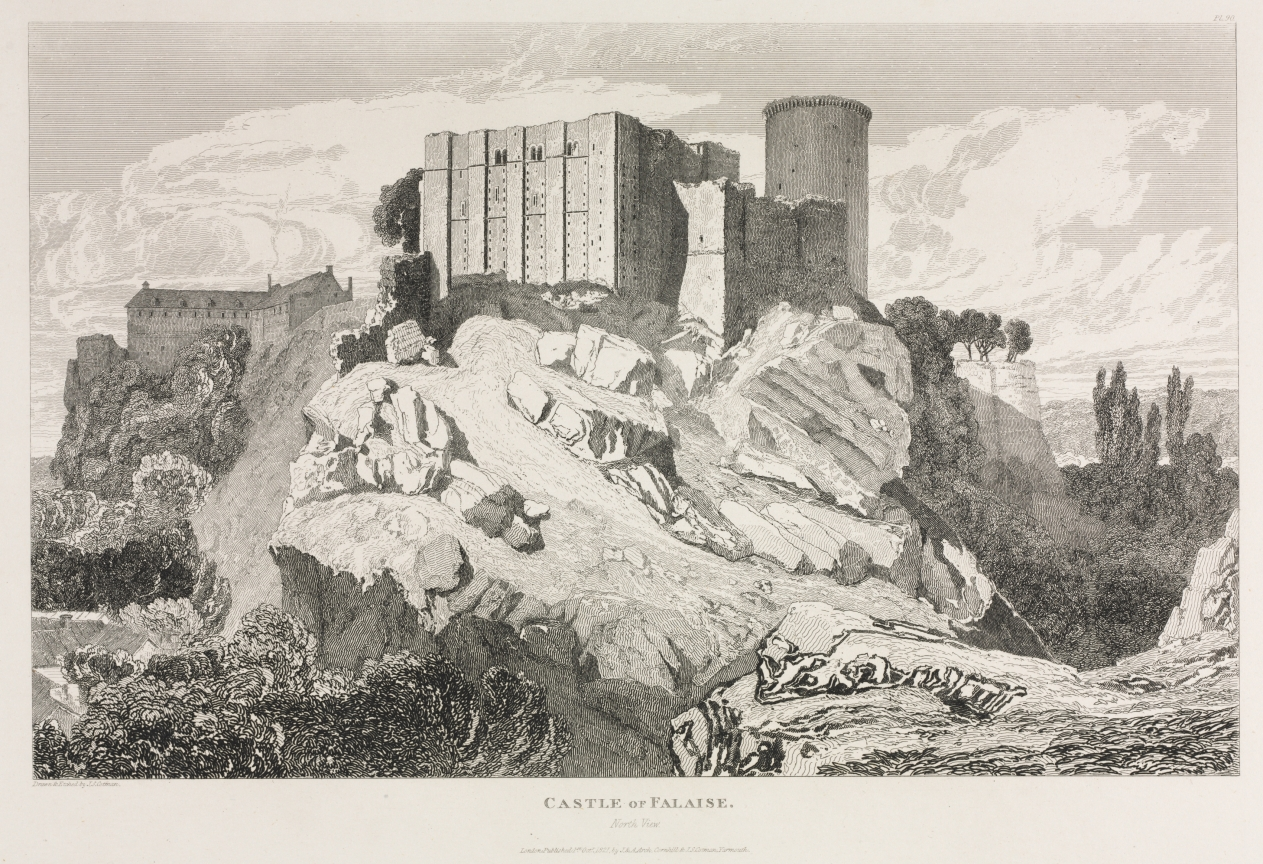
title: Architectural Antiquities of Normandy (Vol. II), Pl. 90: Castle of Falaise (North View)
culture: England, 19th century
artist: John Sell Cotman (British, 1782–1842)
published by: J & A Arch Cornhill & J. S. Cotman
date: 1821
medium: etching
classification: Print